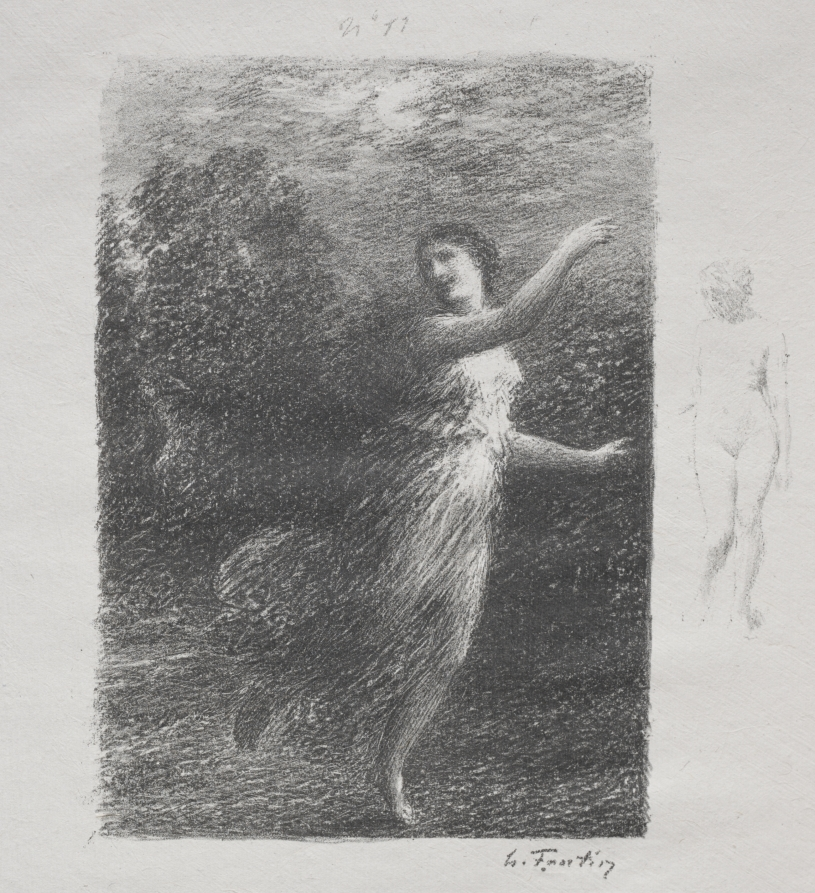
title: XXIV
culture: France, 19th century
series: Illustrations for the Poems of André Chénier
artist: Henri Fantin-Latour (French, 1836–1904)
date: c. 1905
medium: lithograph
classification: Print